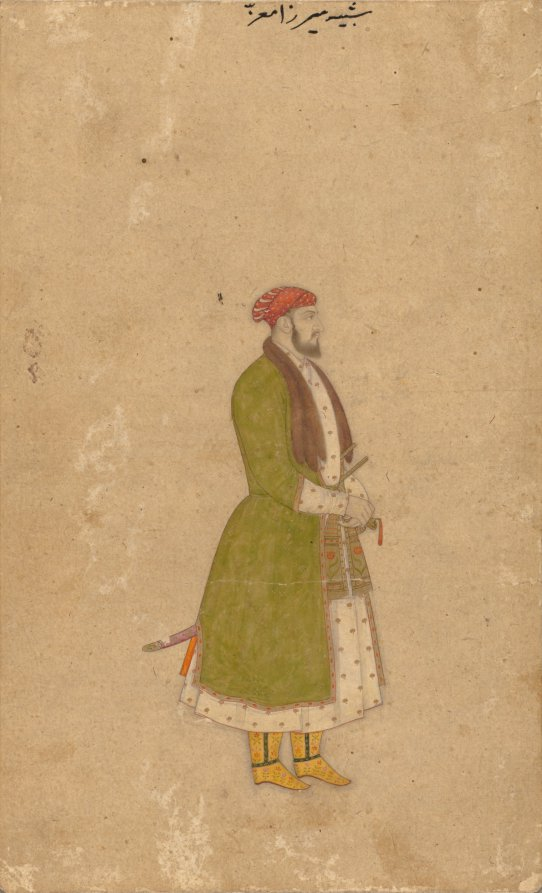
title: Portrait of the Courtier Mirza Muizz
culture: India, Mughal Dynasty (1526-1756)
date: c. 1680–1700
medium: color on paper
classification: Painting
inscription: Inscription: Mizra Muizz